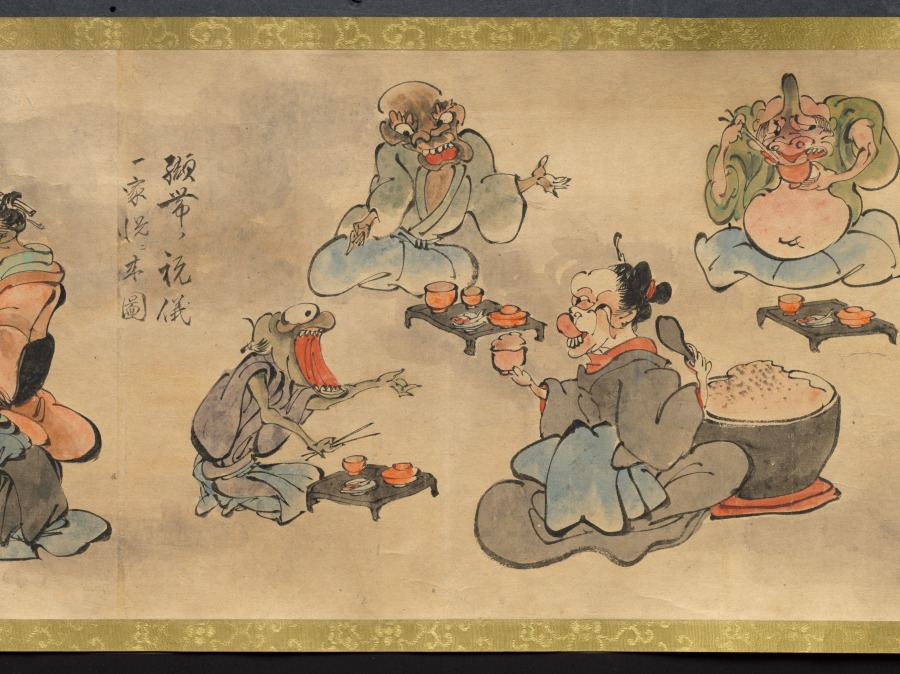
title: An Illustrated Marriage of Apparitions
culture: Japan, Edo period (1615–1868)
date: mid-1800s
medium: handscroll; ink and color on paper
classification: Painting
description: The matchmaking, engagement, wedding, and birth of the first child of two apparitions, or bakemono, literally "things that change," are illustrated in this whimsical, humorous handscroll. Japanese folklore abounds with such strange creatures, most famously represented in handscrolls featuring a procession of 100 supernatural monsters. Aside from a textual preface and cartouches indicating the content of the scenes, the tale is told visually. The artist and whereabouts of the original handscroll are unknown, but a number of other 19th-century copies by amateur painters exist in Japanese collections, attesting to its broad appeal.